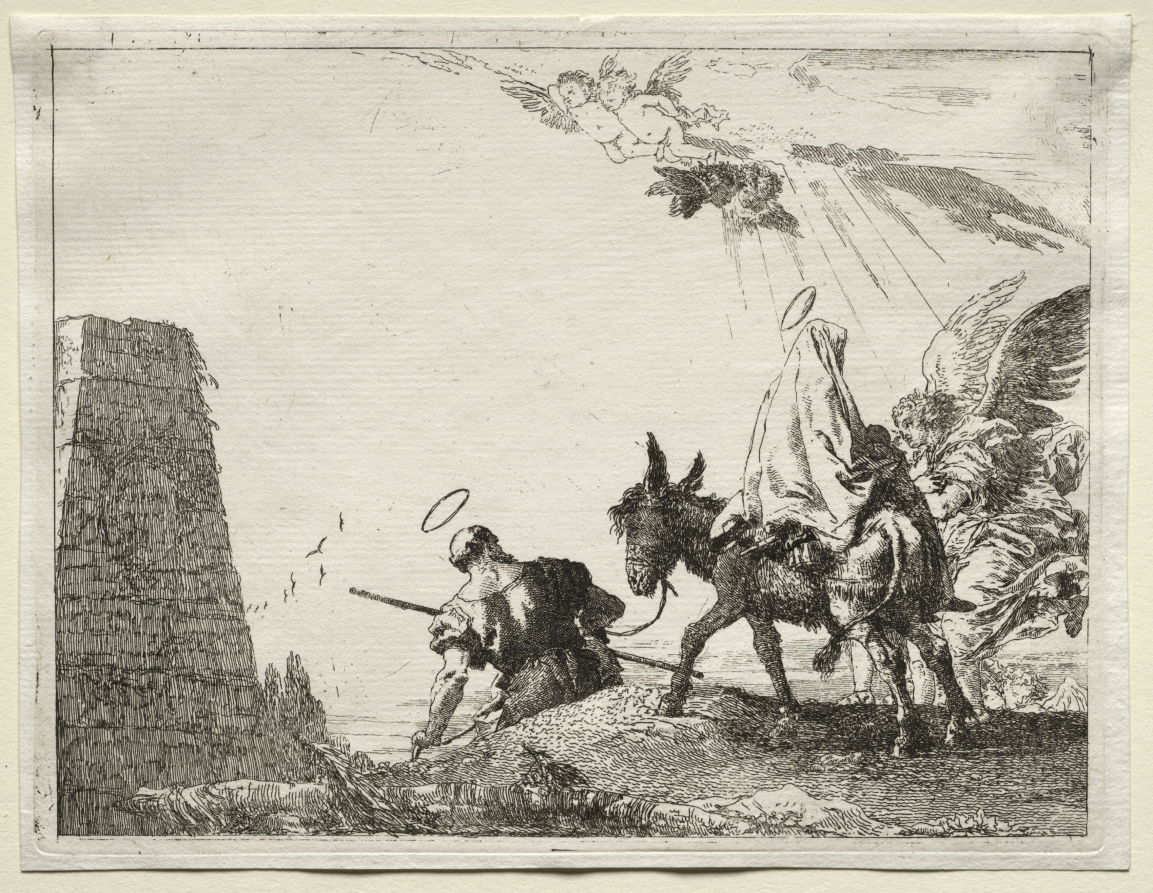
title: Flight into Egypt: The Holy Family Passing near a Pyramid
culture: Italy, 18th century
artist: Giovanni Domenico Tiepolo (Italian, 1727–1804)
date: 1750–53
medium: etching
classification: Print